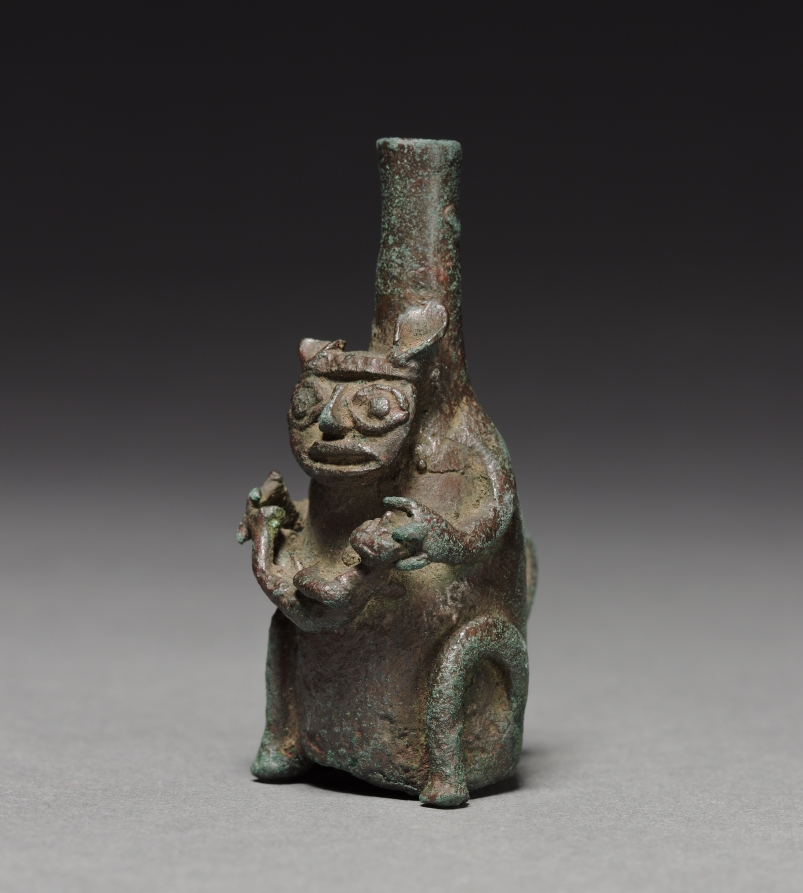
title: Feline Holding Human Figure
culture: Peru, North Coast, Moche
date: c. 100–500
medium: banded travertine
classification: Metalwork